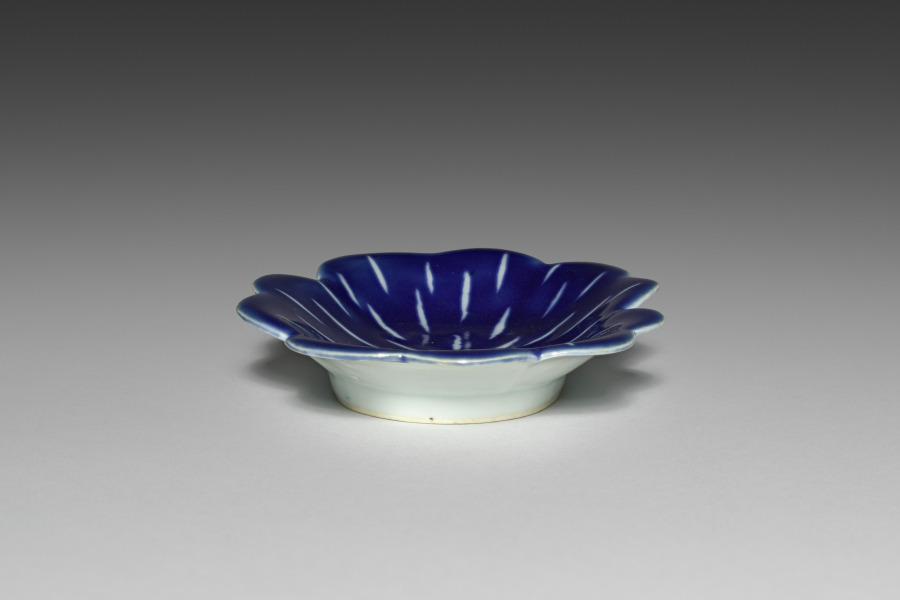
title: Small Dish (Kozara) with Fireworks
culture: Japan, Edo period (1615–1868)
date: mid-1600s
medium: Porcelain with molding and underglaze blue (Hizen ware, Nabeshima type)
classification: Ceramic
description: This dish evokes the popular summer pastime of fireworks displays.